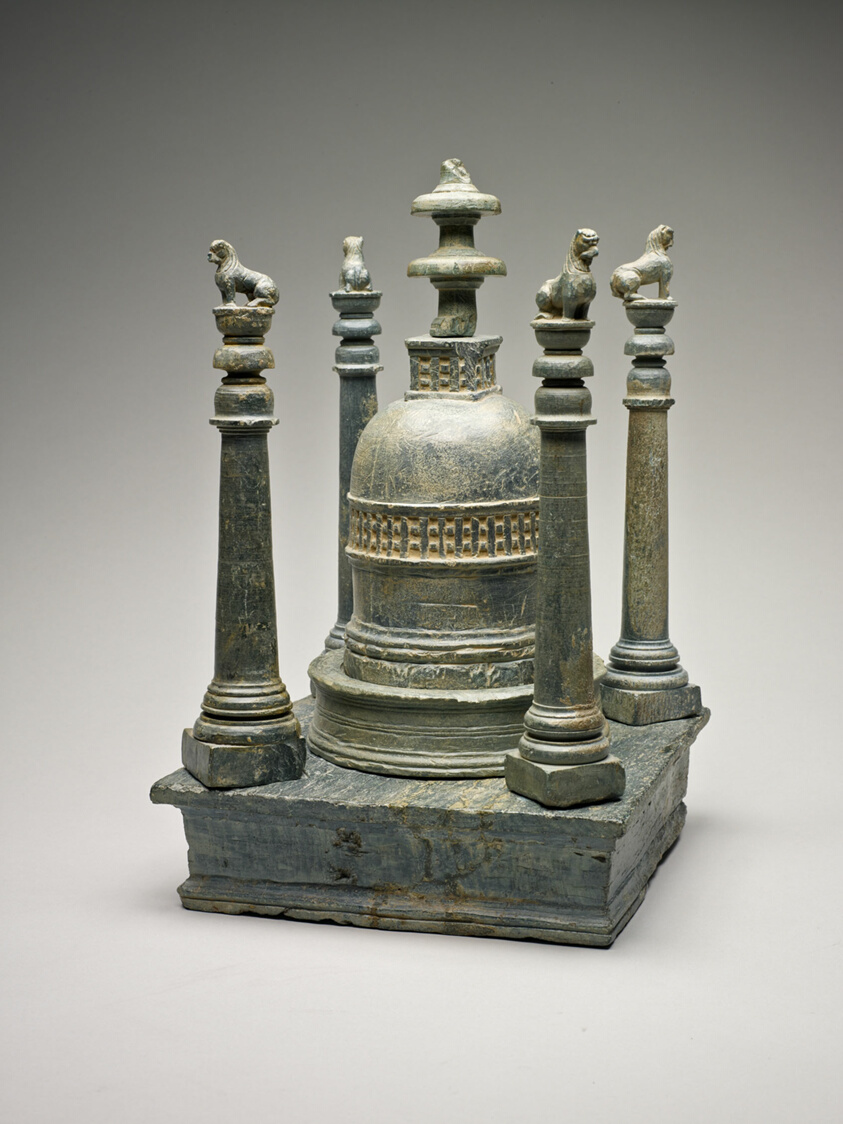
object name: Sculpture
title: Stupa Reliquary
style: South Asian, gandharan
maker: Pakistan; Ancient region of Gandhara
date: Kushan period, about 2nd century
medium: Phyllite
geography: Gandhara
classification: reliquary; container; schist; stone; sculpture; asian art